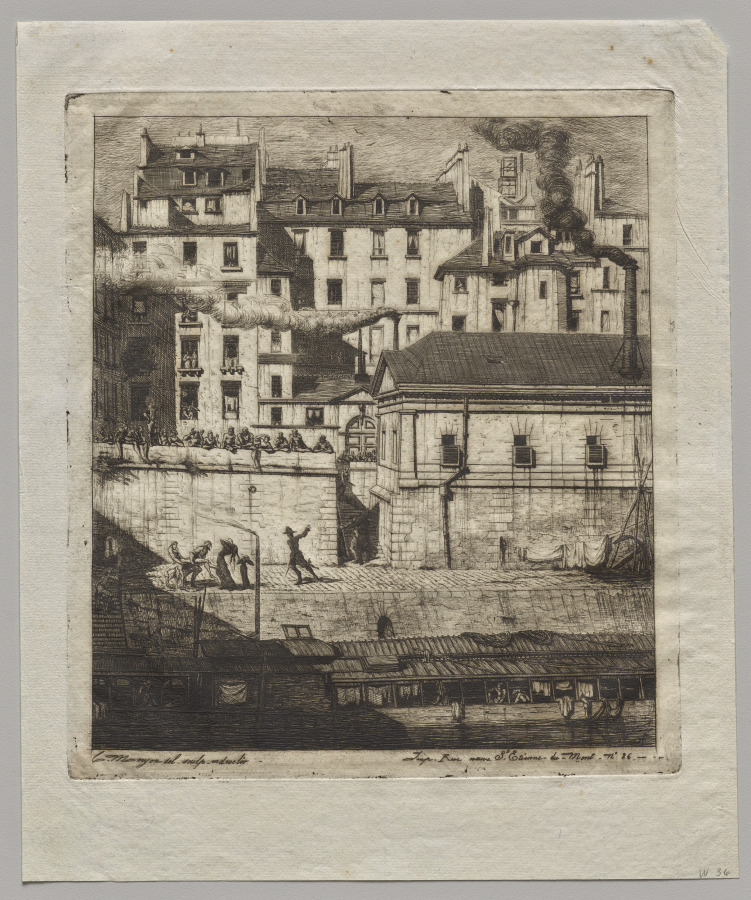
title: The Mortuary, Paris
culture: France, 19th century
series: Etchings of Paris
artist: Charles Meryon (French, 1821–1868)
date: 1854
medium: etching and drypoint on cream laid paper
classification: Print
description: Charles Meryon used etching—a technique that involves drawing on a printing plate with a needle’s point—to create minutely detailed images of Paris that imaginatively present recognizable sites. This print features bateaux-lavoirs (wash boats) on the Seine River, where laundresses could purchase a spot to do their washing. The boats appealed to Meryon, who was fascinated by Paris’s gradual transformation. Since they attracted crowds of working-class women, administrators considered the boats unsightly and unhygienic, repeatedly pushing them closer to the city’s outskirts until few remained by the end of the 1800s.